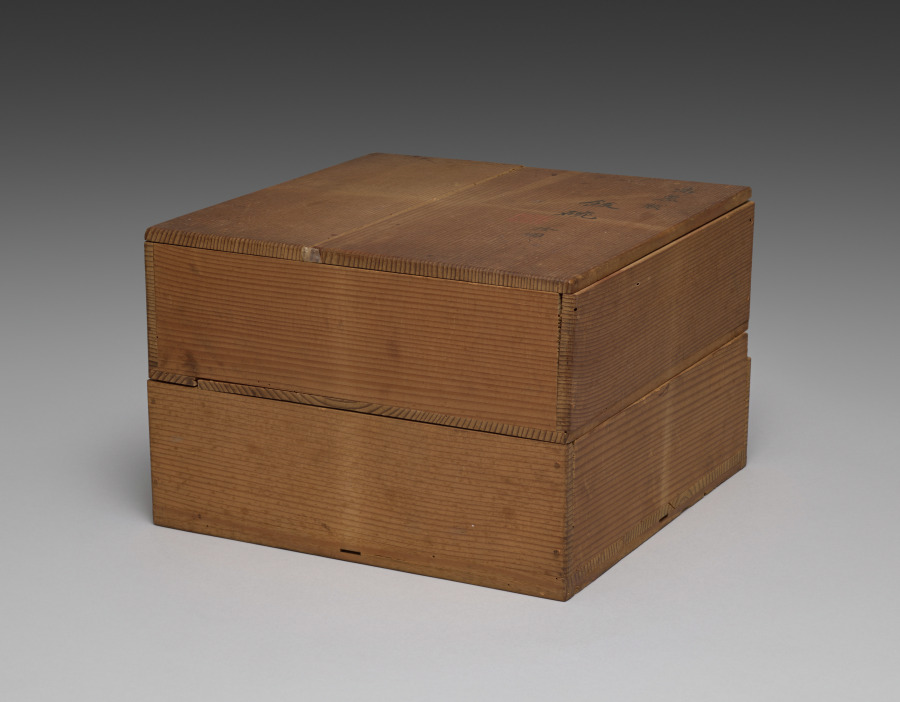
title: Dining Set with Plum Blossoms and Cracked-Ice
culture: Japan, Edo period (1615–1868) to Meiji period (1868–1912)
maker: Seifū Yohei II (Japanese, 1844–1878)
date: 1875–78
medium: Porcelain with molded designs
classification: Ceramic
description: Each item in this set has a delicate low-relief design of flowering plum branches over scattered, intersecting lines meant to resemble the cracked-ice surface of a frozen body of water and is signed on the base in gold pigment. While Yohei II produced many fine works in underglaze blue, like those produced by Kiyomizu Shichibei, he also made works in quite different styles later in his career, from the early 1870 s. In 1873, he was appointed purveyor to the Industrial Center of Kyoto Prefecture, a designation associated with Kyoto’s efforts to reach an international market through the port of Kobe; and from 1875 until his death, he was involved in national-level projects to present Japanese ceramics across the world. It was during this period that Yohei III was apprenticed to Yohei II, and it has been suggested that this set may in fact be an early example of Yohei III’s work, which he signed with his teacher’s name. Decorated with flowers resembling Japanese textile motifs, the set calls to mind the design of Yohei II’s pair of vases with plum blossoms in the Victoria and Albert Museum. Here, the elaborate trees created for a formal public exhibition setting have been translated into the approachable blossoms of the genteel domestic environment. While the designs are consistent across the pieces, each raised flower petal and pistil and each incised line in the ice was done by hand, so the cups, bowls, and dishes are similar yet unique. The bottoms of two boxes once identified the set’s owner, but the information has been deliberately obscured with black ink. However, inscriptions still visible appear to indicate two occasions, once at the end of July 1886 , and once again in June 1916 , when parts of the set were requested from Hokura in Niigata Prefecture. The location corresponds to a neighborhood in the present-day city of Jōetsu. The surname Tsuji 辻 also appears on a paper tag affixed to one of the box cloths. Future research may possibly reveal more about their provenance. A vase by Yohei III in a private collection combines the formal grandeur of the Yohei II vases in the Victoria and Albert Museum with the gentler design of this dining set, placing flowering plum trees against soft, scalloped-edge clouds resembling those in golden screens.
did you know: The dining wares have a creamy white coloration that the four boxes containing them identify as Korean in style.